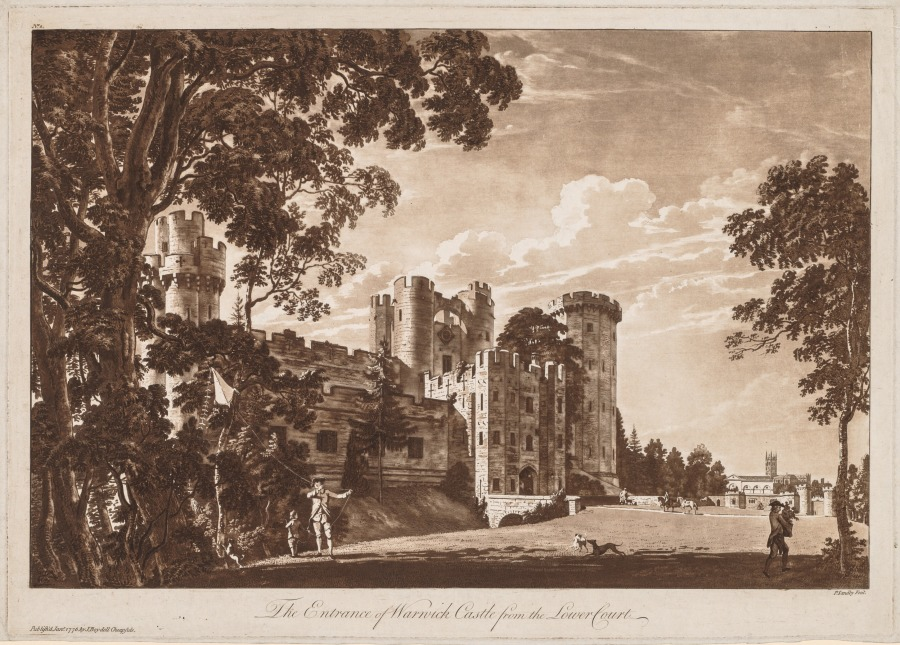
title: Views of Warwick Castle: The Entrance of Warwick Castle from the Lower Court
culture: England, 18th century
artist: Paul Sandby (British, 1731–1809)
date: 1776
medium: etching and aquatint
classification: Print